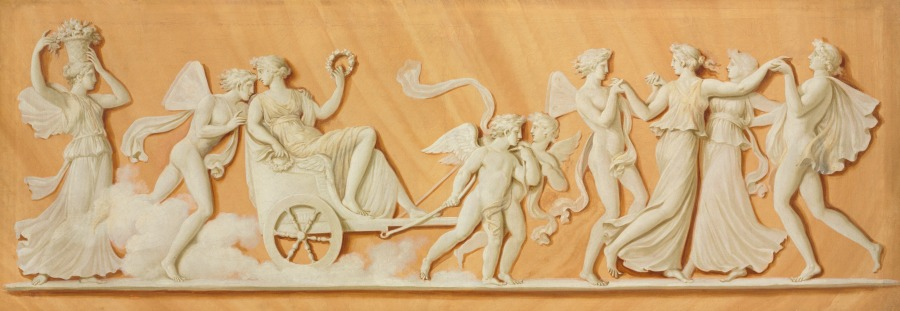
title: Overdoor Painting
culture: France, 18th century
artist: Pierre Rousseau (French, 1751–1829)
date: 1790s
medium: oil on canvas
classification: Painting